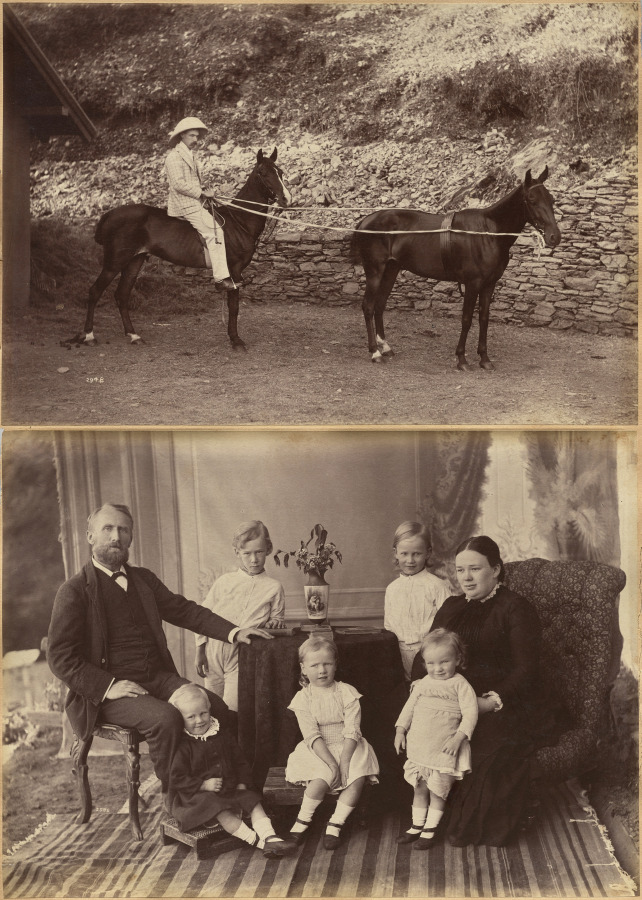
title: Captain H.S. Rawhinson (recto); Mr. Robert Holtz and Family (verso)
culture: India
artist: Raja Deen Dayal (Indian, 1844–1905)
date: c. 1882–87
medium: albumen print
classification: Photograph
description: These photographs are part of an album, now disassembled, of around 105 photographs taken in India between 1885 and summer 1887 that provide glimpses into the lives of the British colonial elite and royal and upper-class Indians. The museum holds another group of 37 pictures from this album (2016.266), which was probably commissioned by a British civil servant visiting or working in India around 1888 as a personal souvenir of his experiences there.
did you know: Raja Deen Dayal is regarded now, and was considered during his lifetime, to be India’s most important 19th-century photographer.